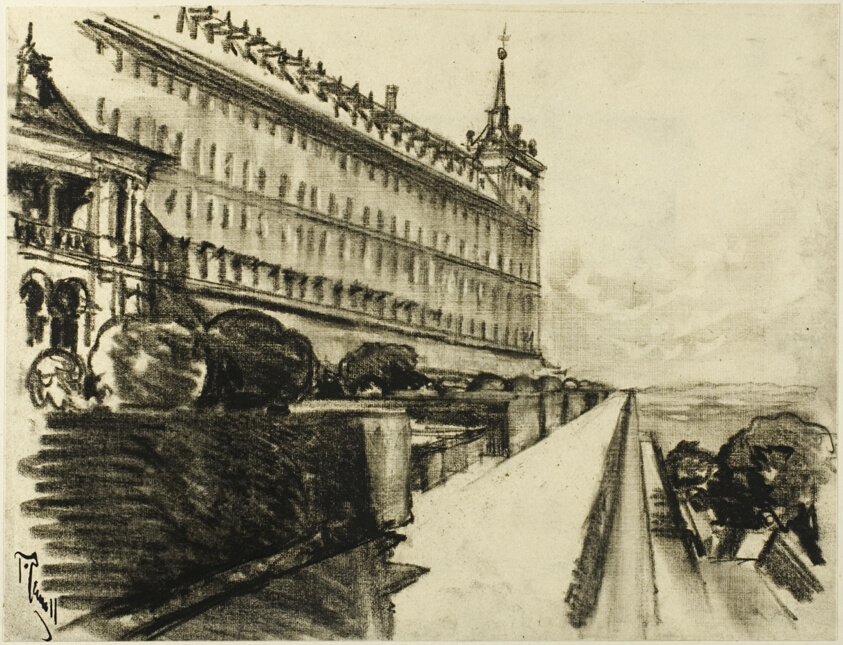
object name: Drawing and Watercolor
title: The Endless Escorial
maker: Joseph Pennell (American, 1857-1926)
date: c. 1903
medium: Oiled charcoal with stumping and erasing, on cream wove paper, perimeter mounted on off-white wood pulp laminate board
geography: United States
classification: charcoal; drawings (visual works); prints and drawing